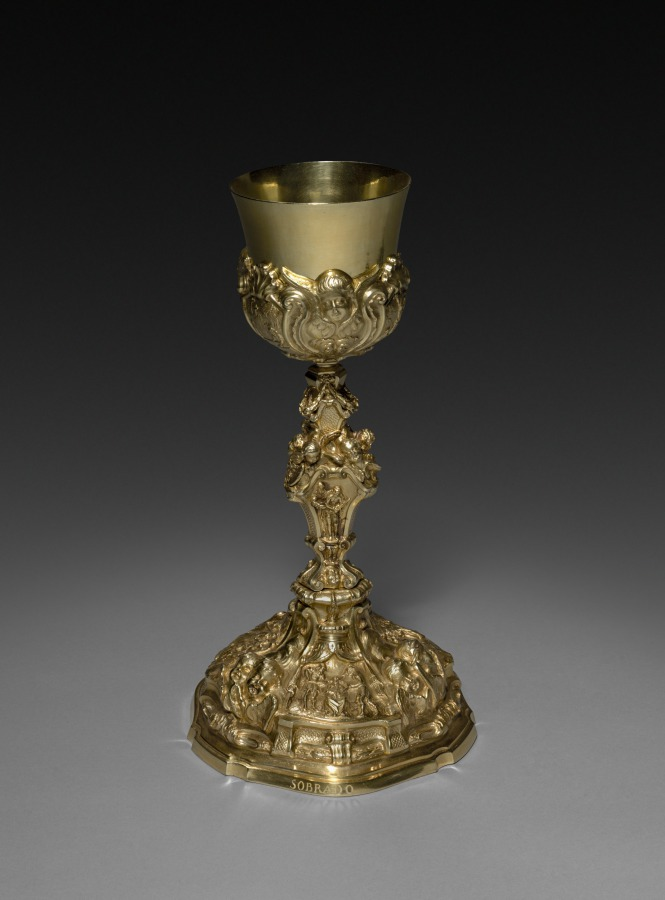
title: Chalice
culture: Spain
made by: Antonio Lopez (Spanish)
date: 1732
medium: silver gilt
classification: Metalwork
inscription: engraved on base: "Sobrado" (Monastery-N.W. Spain).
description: To make this chalice, Antonio Lopez probably worked from a drawn or printed design. The vessel features seraphim, the highest order of angels, interspersed with scrolling vignettes of scenes from Christ’s suffering and death. The etched “Sobrado” on the base suggests that the chalice may have once been used to celebrate Catholic Mass at the Cistercian abbey church of Sobrado in northwest Spain.